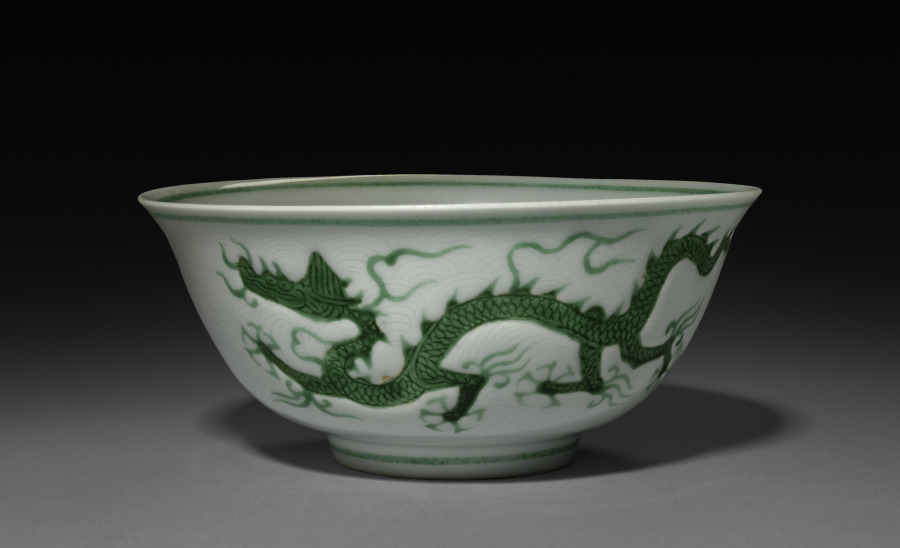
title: Bowl with Dragons in Waves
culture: China, Jiangxi province, Jingdezhen kilns, Ming dynasty (1368-1644), Zhengde mark and reign (1506-21)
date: 1506–21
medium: porcelain with incised decoration and green overglaze enamel and resist enamel decoration on biscuit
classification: Ceramic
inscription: 大明正德年製